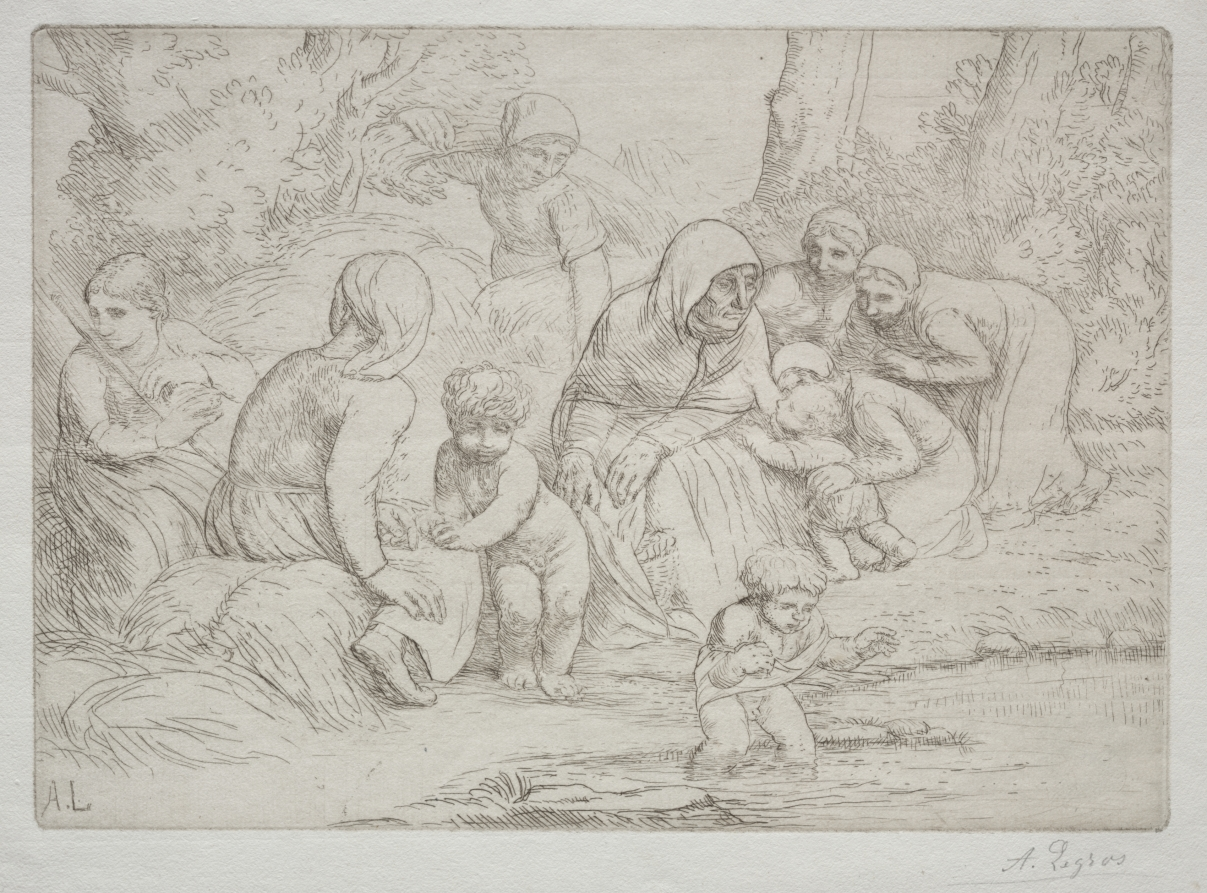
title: L'Été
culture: France, 19th-20th century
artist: Alphonse Legros (French, 1837–1911)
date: c. 1857–1911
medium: etching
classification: Print